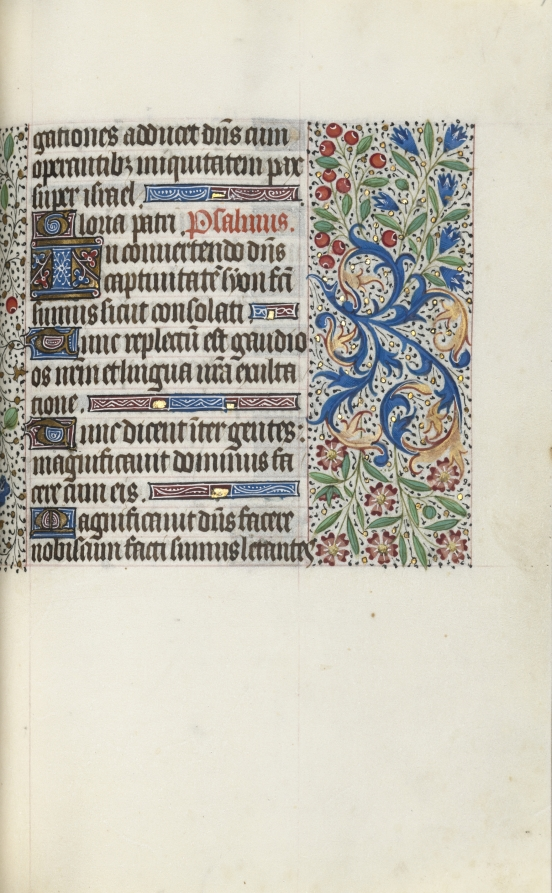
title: Book of Hours (Use of Rouen): fol. 72r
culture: France, Rouen, 15th century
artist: Master of the Geneva Latini (French, active Rouen, 1460–80)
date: c. 1470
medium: ink, tempera, and gold on vellum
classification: Bound Volume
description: In the late 1400s and early 1500s Rouen was an established and important center of book production. The city’s cathedral had a wealthy chapter that spent large sums of money to commission books and to maintain its extensive library. The stationers and booksellers would have likely been concentrated in or near the cathedral precinct. This artist, named after a manuscript now in Geneva, was Rouen’s principal illuminator during the second half of the 1400s.